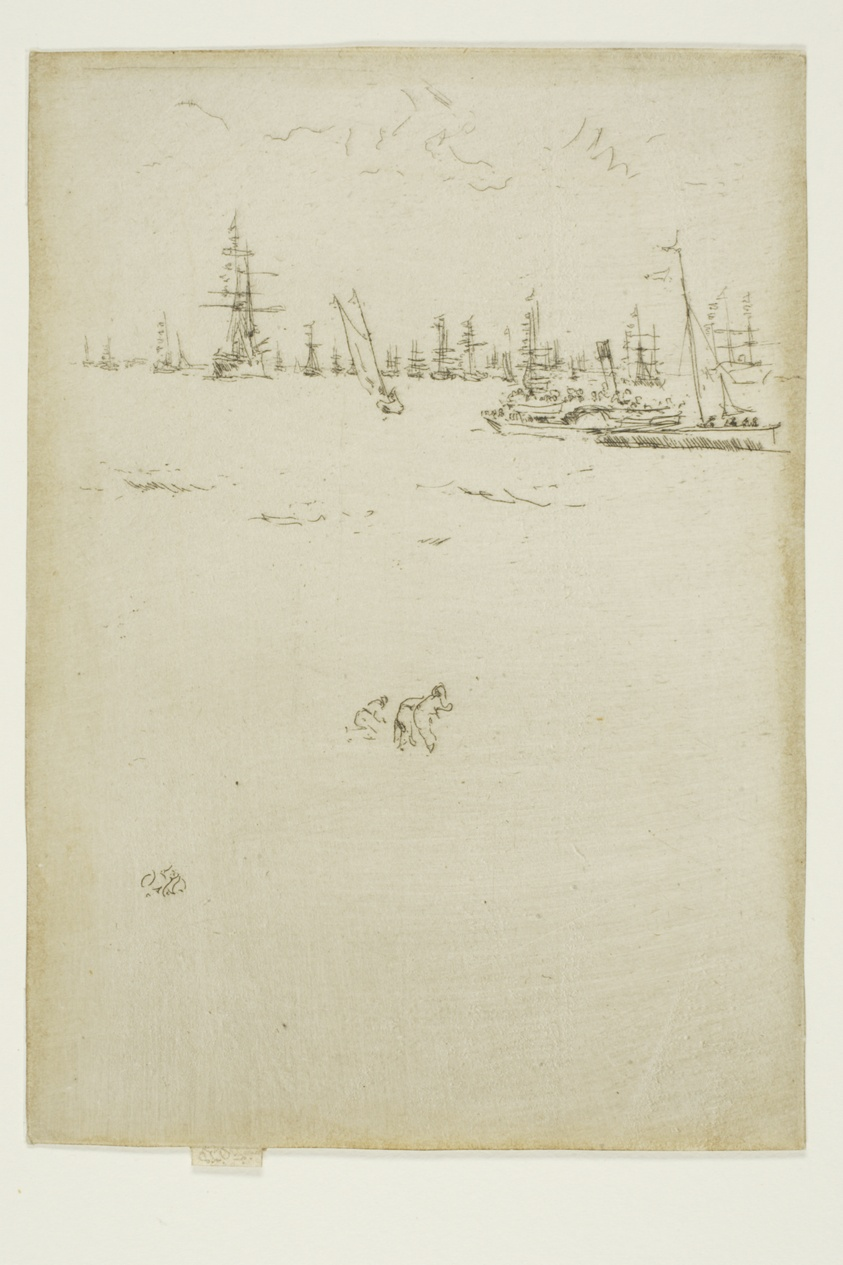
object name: Print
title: The Visitors' Boat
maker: James McNeill Whistler (American, 1834-1903)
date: 1887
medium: Etching with foul biting in black ink on cream laid paper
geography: United States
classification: etching; foul biting; print; prints and drawing; paper